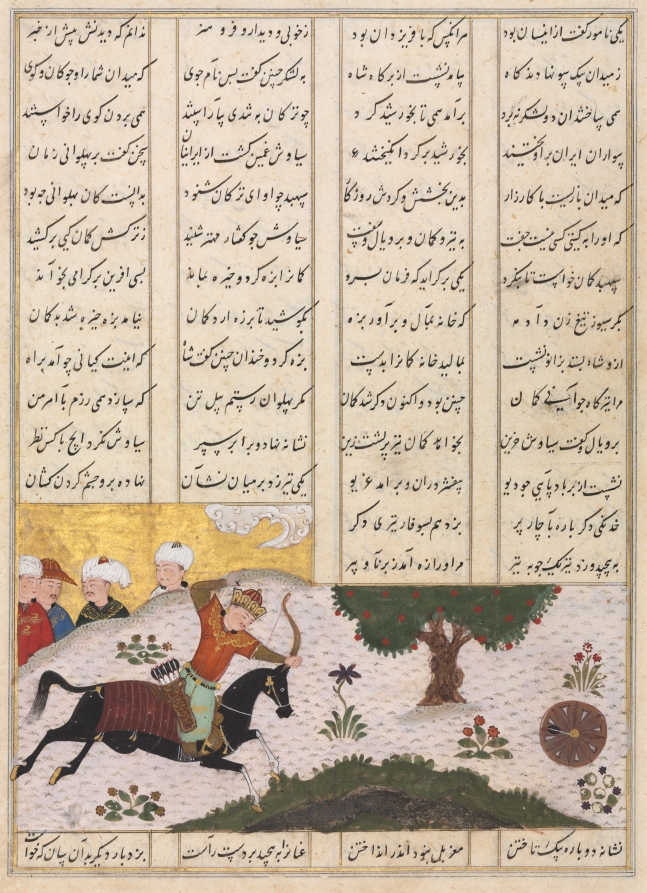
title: Siyavush on His Horse Hitting a Rolling Target, from a Shahnama (Book of Kings) of Firdausi (940–1019 or 1025) (recto)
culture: Iran, Shiraz, Timurid period (1370-1501)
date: late 1400s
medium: Opaque watercolor, silver, gold, and ink on paper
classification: Manuscript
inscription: script: Nasta'liq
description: A prince from Iran’s early legendary history, Siyavush was sent by his father, the shah, to train under the great warrior Rustam in the arts of hunting, archery, and horseback riding. In this painting, Siyavush demonstrates his considerable skill by hitting the bulls eye on a rolling target from horseback. The gold sky, pastel ground with grassy tufts, and dense leafy riverbank are distinctive features of Persian painting during this period.